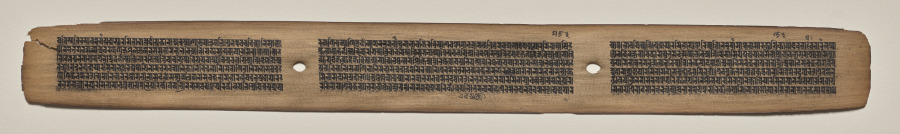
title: Text, Folio 28 (recto), from a Manuscript of the Perfection of Wisdom in Eight Thousand Lines (Ashtasahasrika Prajnaparamita-sutra)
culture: Eastern India, Bihar, Vikramashila Monastery. Painting: Nepal, Kathmandu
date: Sunday, September 14, 1119 (year 239 of the Newar Samvat in the month of Ashvina)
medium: gum tempera and ink on palm leaves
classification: Painting